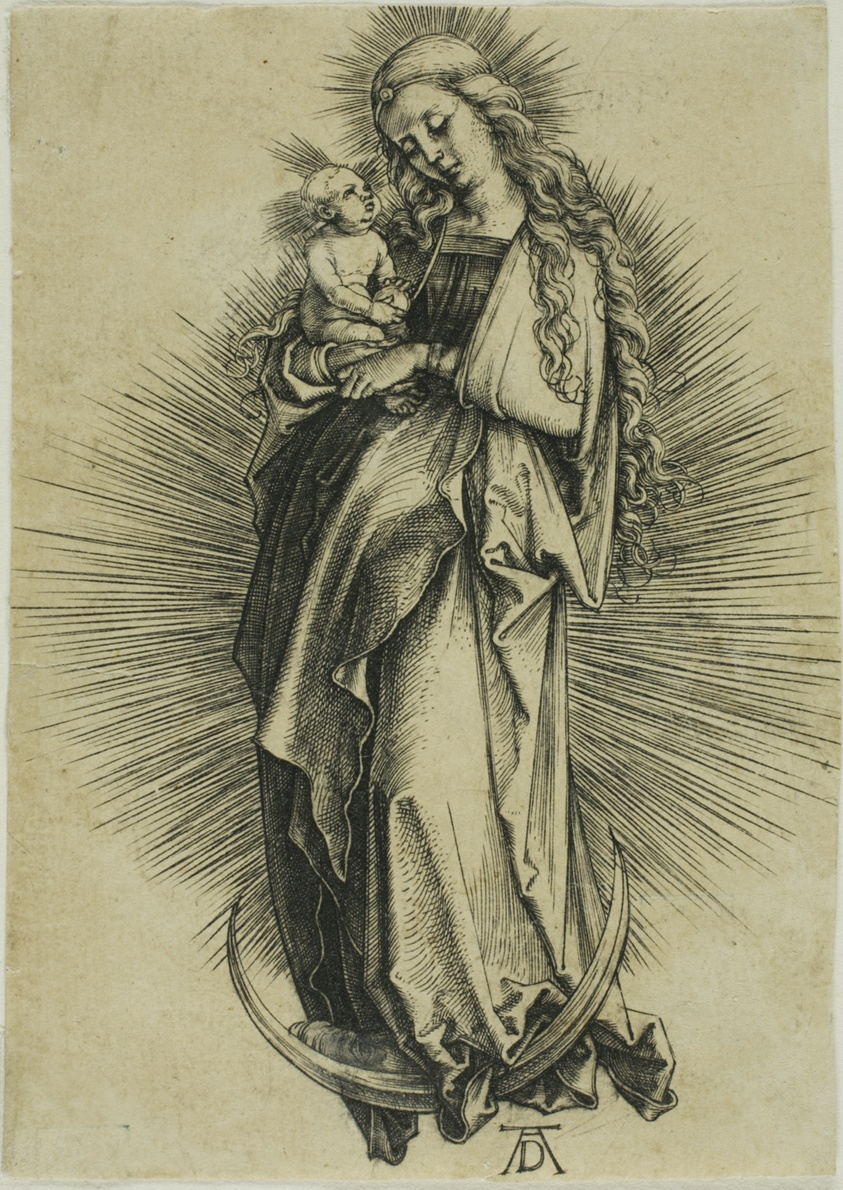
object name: Print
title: The Virgin on the Crescent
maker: Albrecht Dürer (German, 1471-1528)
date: c. 1499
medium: Engraving in black on cream laid paper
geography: Germany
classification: engraving; print; prints and drawing; paper